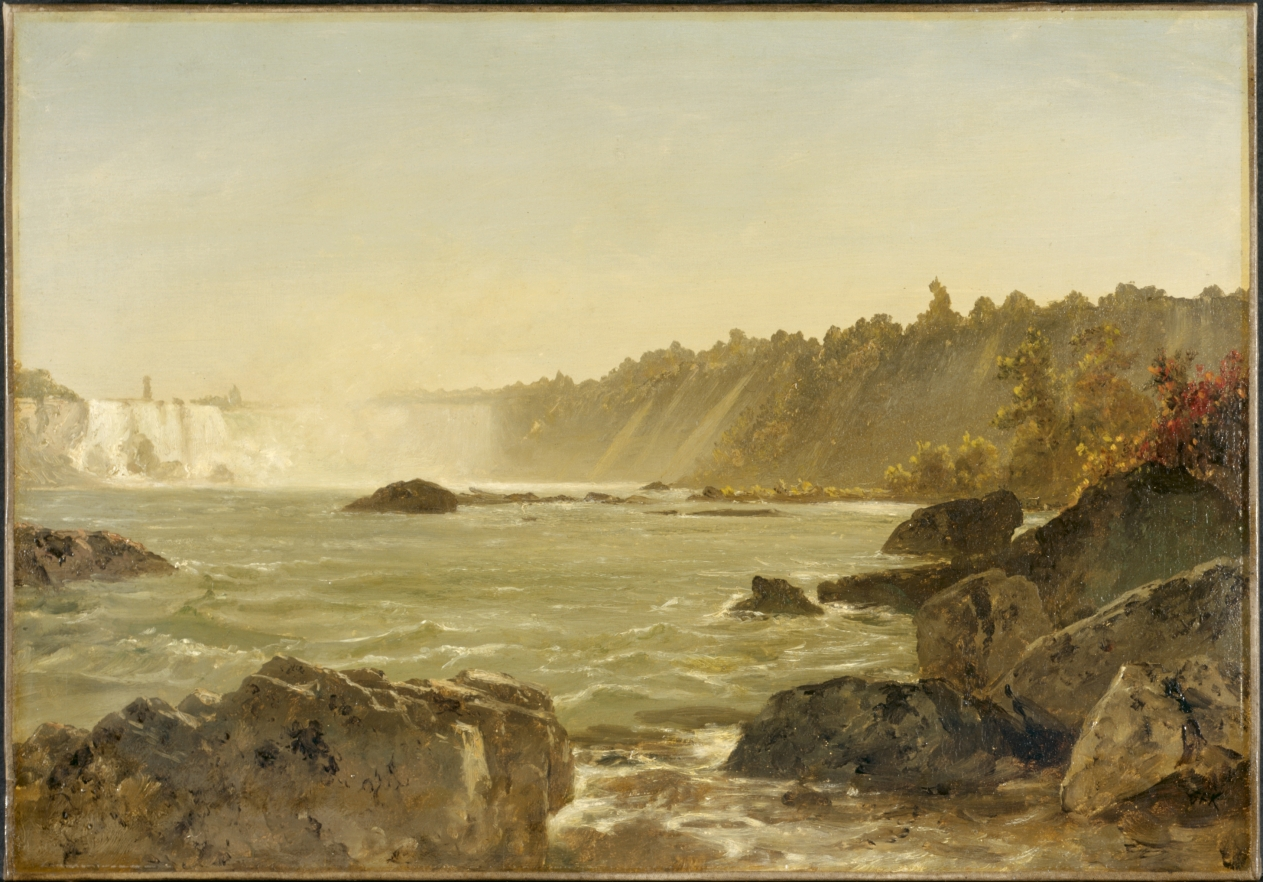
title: View of Niagara Falls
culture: America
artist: John Frederick Kensett (American, 1816–1872)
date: c. 1851–1852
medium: oil on canvas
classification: Painting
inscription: signed lower right: JFK